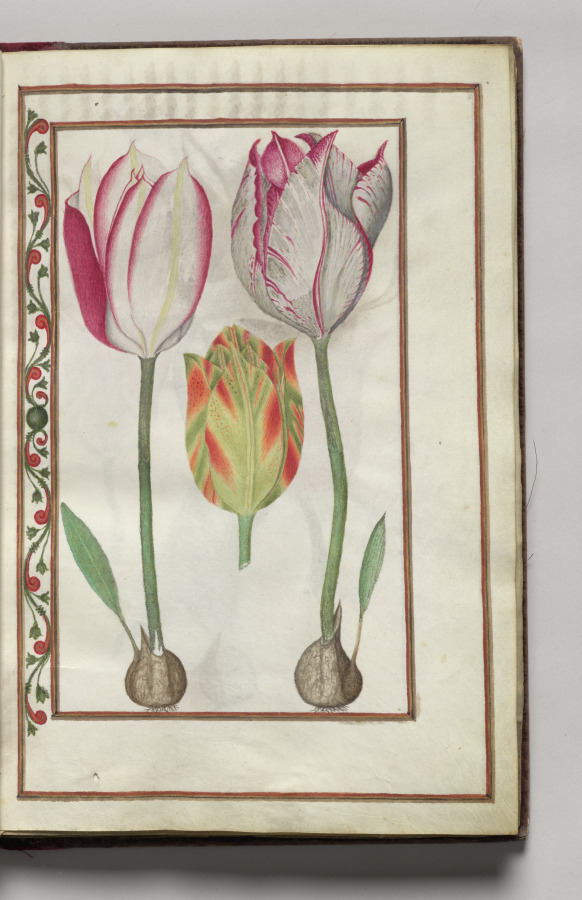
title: Tulips, folio 2 (recto), from Florilegium (A Book of Flower Studies)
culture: France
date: 1608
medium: watercolor, ink, silver, and gold over occasional traces of pencil, on vellum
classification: Bound Volume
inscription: Dated: Poitiers 1608 (on frontispiece) Signed: On frontispiece in black ink, lower right: Van Kuyk Notation on drawing: Frontispiece: in pencil, lower margin: * élève de Van Kessel, peintre flammand (* in pencil also appears in front of Van Kuyk's name).